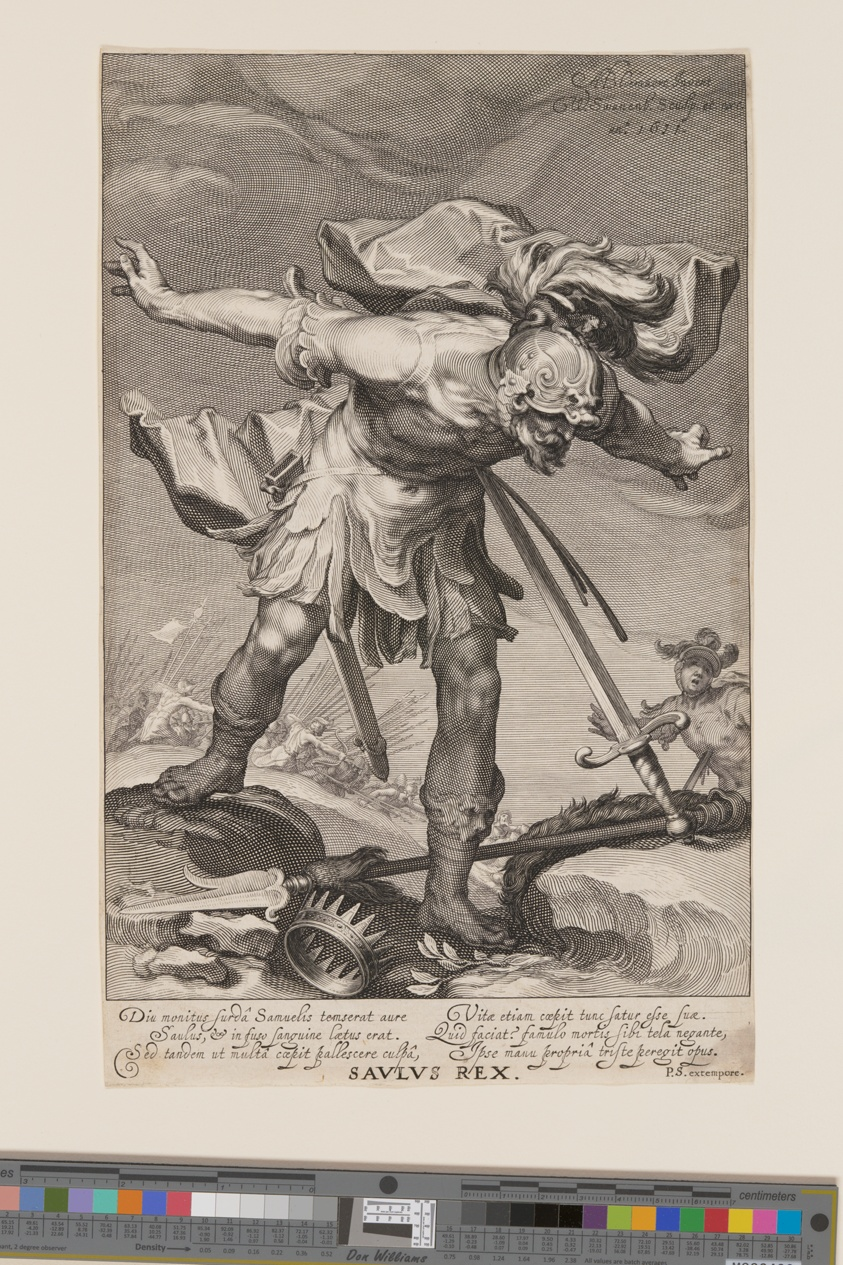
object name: Print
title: Saulus Rex, from Sinners of the Old and New Testament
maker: Willem van Swanenburgh (Dutch, 1580–1612); after Abraham Bloemaert (Dutch, 1566–1651)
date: 1611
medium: Engraving on ivory laid paper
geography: Netherlands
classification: engraving; paper; print; prints and drawing